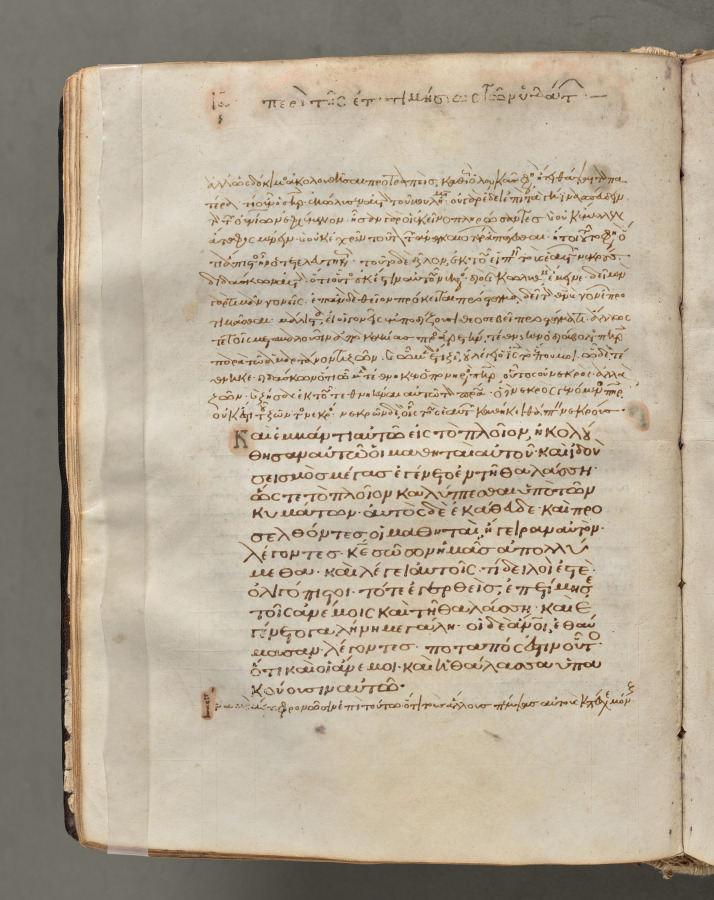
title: Text, folio 35 (verso), from a Gospel Book with Commentaries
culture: Byzantium, Constantinople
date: c. 1000–1100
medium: ink, tempera, and gold on vellum; leather binding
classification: Bound Volume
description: Each of the four gospels in this book opens on a page with brilliantly illuminated borders depicting the author of the text as well as birds—principally peacocks, symbols of the immortality of the soul—and fountains, representing the fountain of life and the salvation of the soul. This volume consists of 428 leaves with texts in Greek. Its level of sophistication suggests that it was probably written and decorated in a monastery in Constantinople.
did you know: Gospel Books were carried in procession through Byzantine churches.